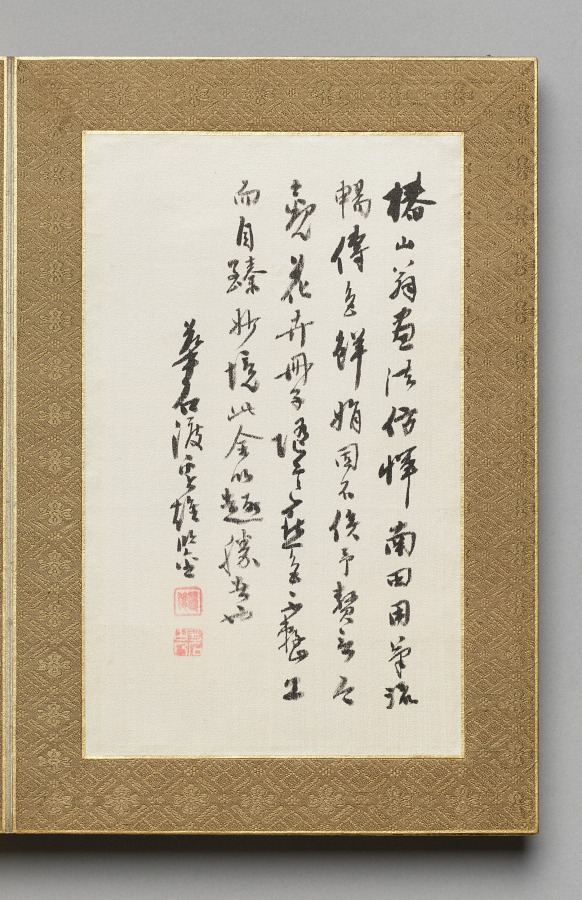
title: Preface from Flowers and Grasses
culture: Japan, Edo period (1615–1868)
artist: Tsubaki Chinzan (Japanese, 1801–1854)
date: 1841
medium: leaf from folding-album; ink on paper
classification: Painting